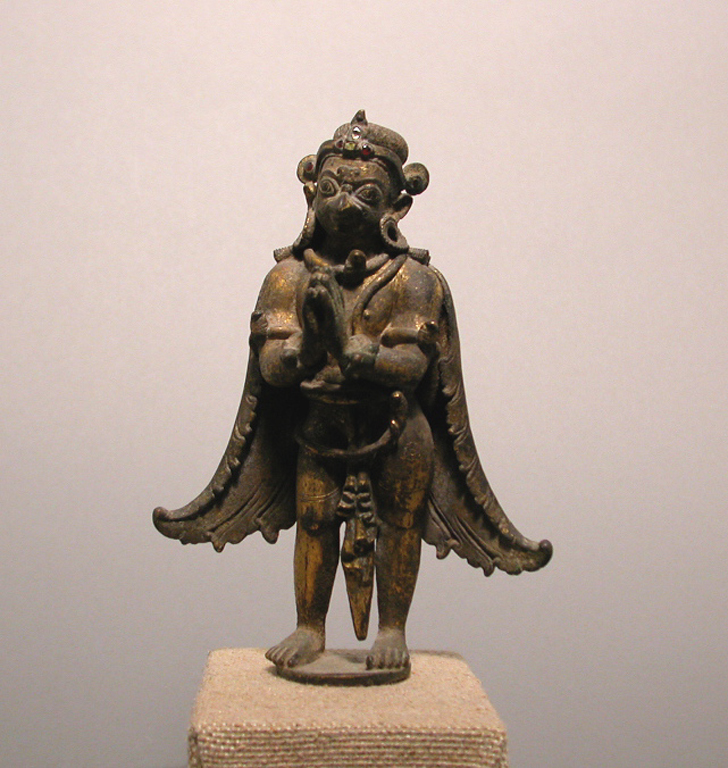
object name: Sculpture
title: God Vishnu's Mount, Garuda, Standing with Hands in Gesture of Adoration (Anjalimudra)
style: Himalayan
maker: Nepal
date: 13th century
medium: Gilt bronze with gemstones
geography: Nepal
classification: bronze; metal; sculpture; asian art